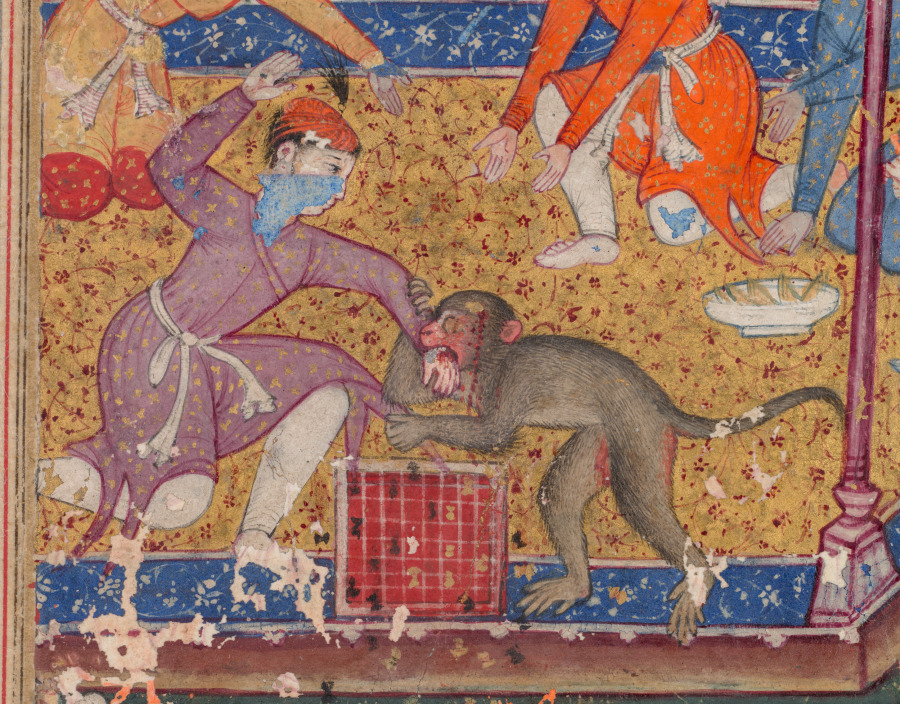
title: The wounded monkey bites the hand of the prince, his chessmate, in the presence of guests, from a Tuti-nama (Tales of a Parrot): Fifth Night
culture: Mughal India, court of Akbar (reigned 1556–1605)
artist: Dasavanta (Indian, d. 1584)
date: c. 1560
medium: gum tempera, ink, and gold on paper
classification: Painting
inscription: 'amal daswant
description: This painting depicts a scene from the cautionary tale the mother parrot tells her young to warn them that interspecies friendships, like theirs with the fox cubs, are a bad idea. She tells them that there once was a monkey who could play chess, and he enjoyed many games with a prince. When the prince invited dignitaries for a party, the monkey made a bad joke, the prince slapped him, and the monkey bit him in return. At the left, food is prepared as the guests look on in astonishment. An inscription at the bottom of the page names the artist, who went on to become one of the most celebrated Indian masters at the Mughal court.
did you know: Young master artist Dasavanta put a layer of cool blue color under his painting.